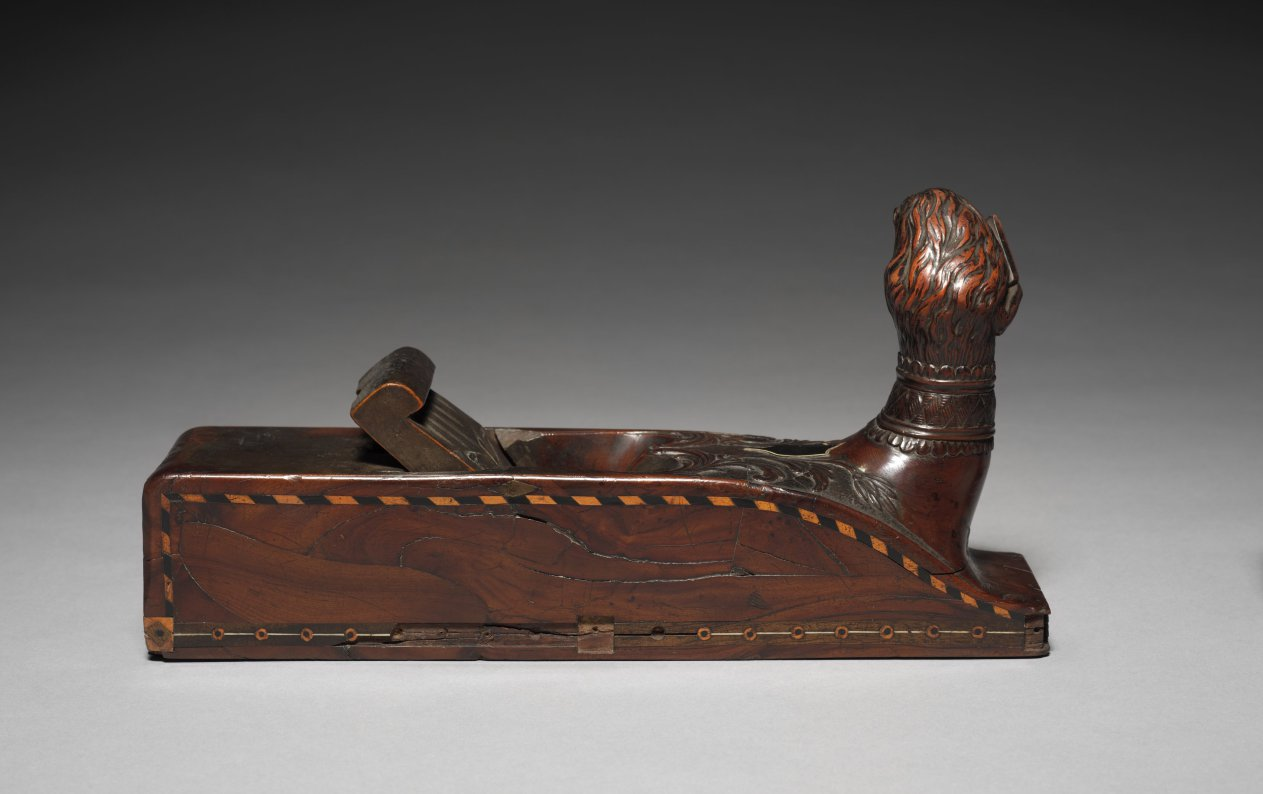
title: Carpenter's Plane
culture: Italy, late 17th century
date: late 1600s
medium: wood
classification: Tool